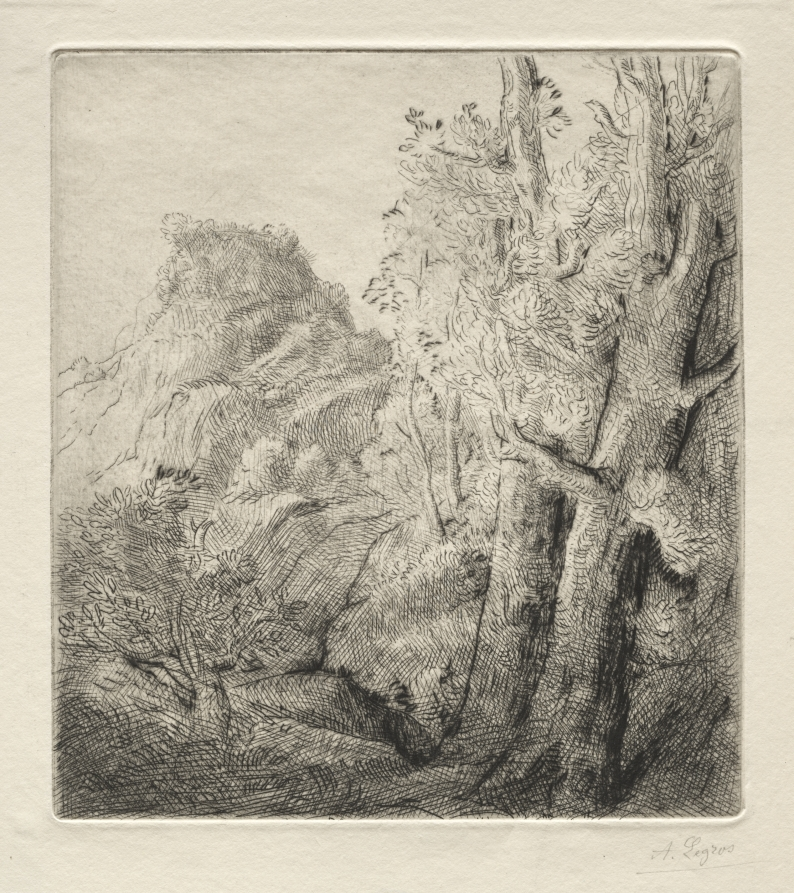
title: The Old City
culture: France, 19th-20th century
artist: Alphonse Legros (French, 1837–1911)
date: c. 1857–1911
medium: etching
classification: Print